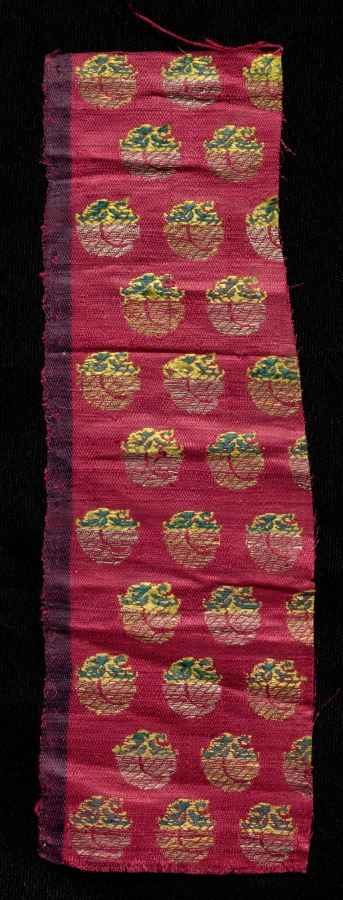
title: Fragment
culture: India, 19th century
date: 1800s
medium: brocade; satin ground with silk and gold thread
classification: Textile